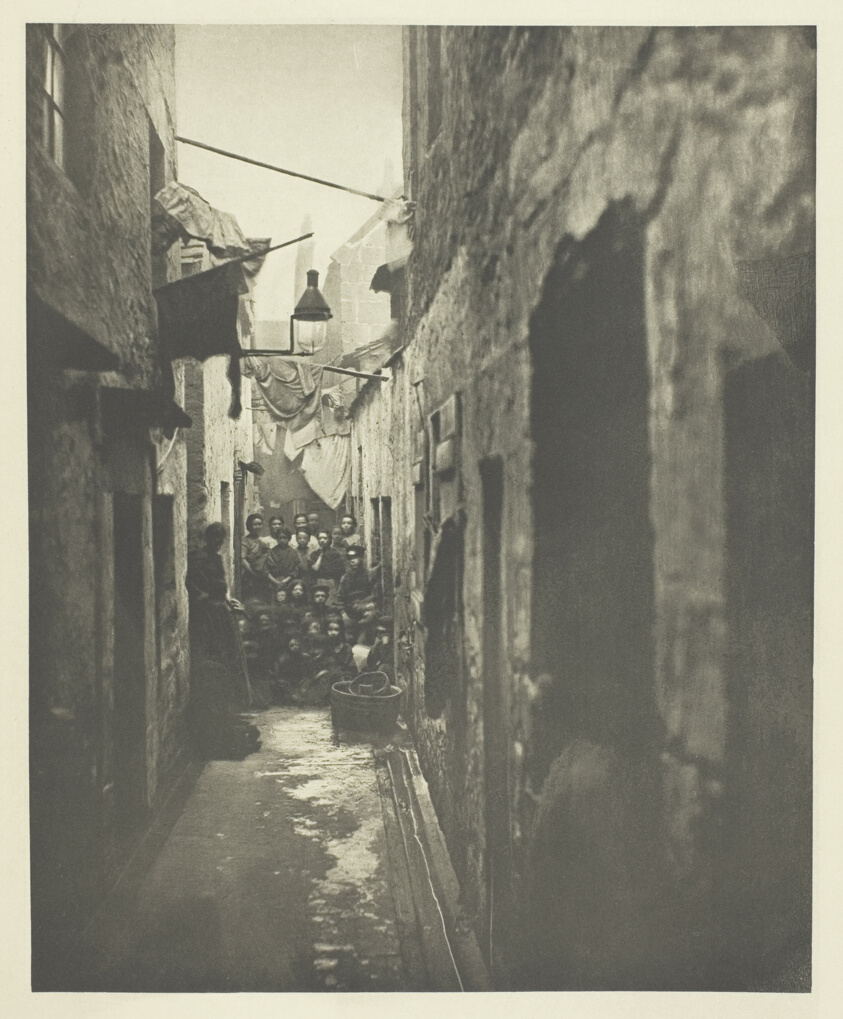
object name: Photograph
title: Close No. 118 High Street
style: 19th century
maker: Thomas Annan (Scottish, 1829–1887)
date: 1868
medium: Photogravure, plate 6 from the book "The Old Closes & Streets of Glasgow" (1900)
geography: Scotland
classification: photograph; photography